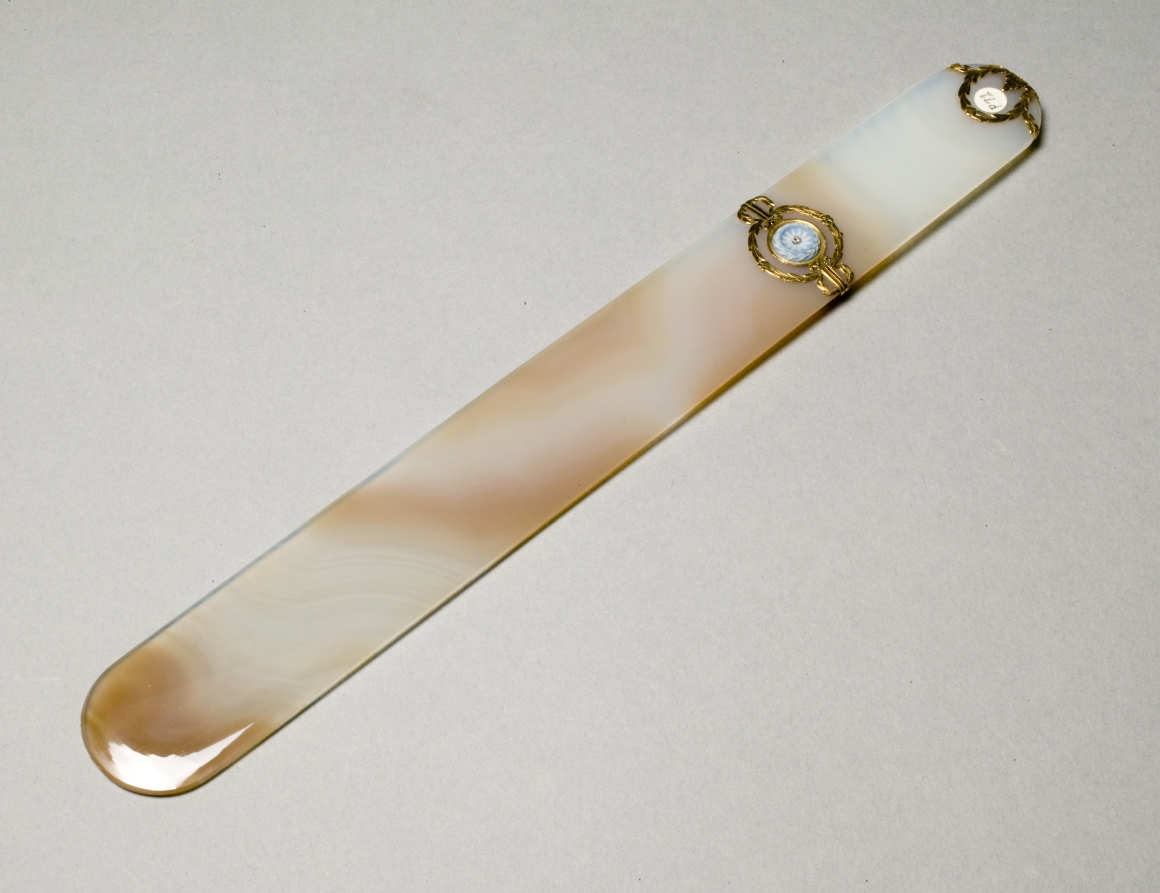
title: Paper Knife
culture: England, late 19th century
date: c. 1890–1910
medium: agate with gold mounts and Wedgewood plaques set with diamonds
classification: Miscellaneous